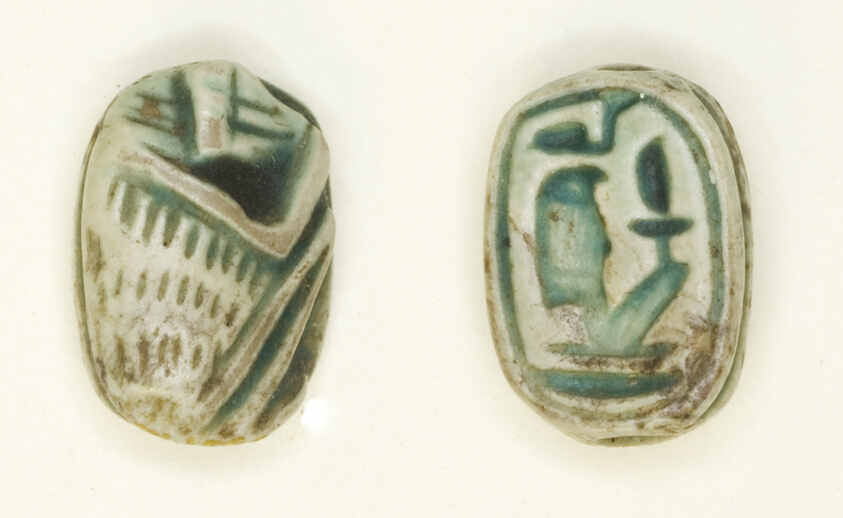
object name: Costume and Accessories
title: Scaraboid: Monkey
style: new kingdom, egyptian, ancient, eighteenth dynasty, nineteenth dynasty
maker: Egyptian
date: New Kingdom, Dynasties 18–19 (about 1550–1186 BCE)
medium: Glazed steatite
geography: Egypt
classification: scaraboids; amulet; ancient art; costume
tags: baboon, deities, gods (deities), Hieroglyphs, monkeys